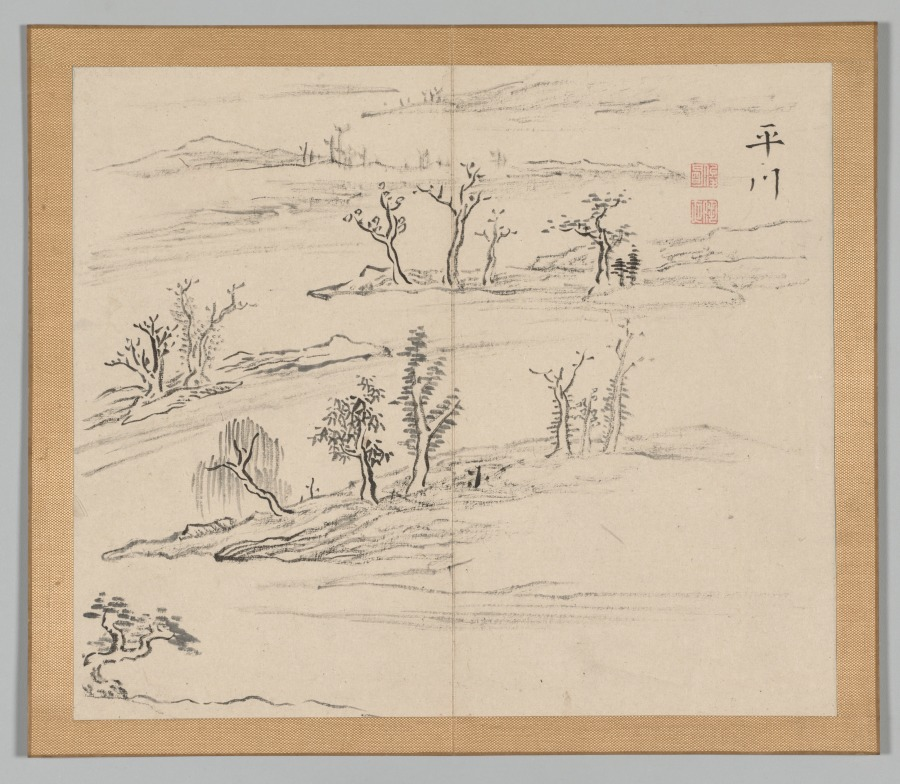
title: Reverberations of Taiga, Volume 2 (leaf 9)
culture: Japan, Edo period (1615–1868)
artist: Aoki Shukuya (Japanese, d. 1802)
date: mid- to late 1700s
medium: double-leaf from a pair of albums; ink and light color on paper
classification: Portfolio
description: Traditionally, young painters in Japan began their studies with an established master-painter. The master's compositions invariably became models that the apprentice copied to learn various ink and brush techniques. Shukuya was a pupil of the famous Kyoto artist Ikeno Taiga, whose style is reflected in these sketches of rocks, trees, and mountains.